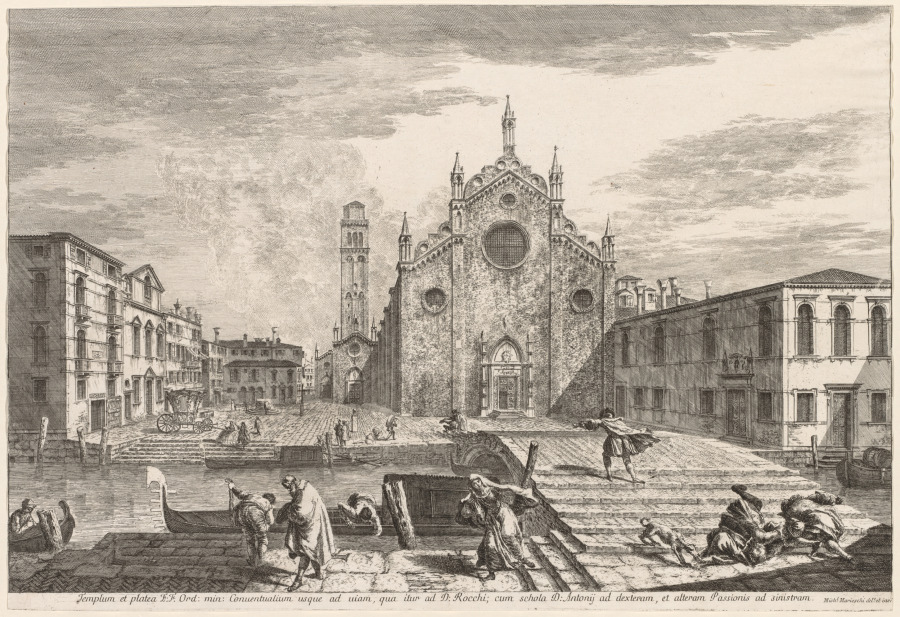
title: Views of Venice: Campo dei Frari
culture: Italy, 18th century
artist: Michele Marieschi (Italian, 1710–1743)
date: 1741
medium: etching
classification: Print